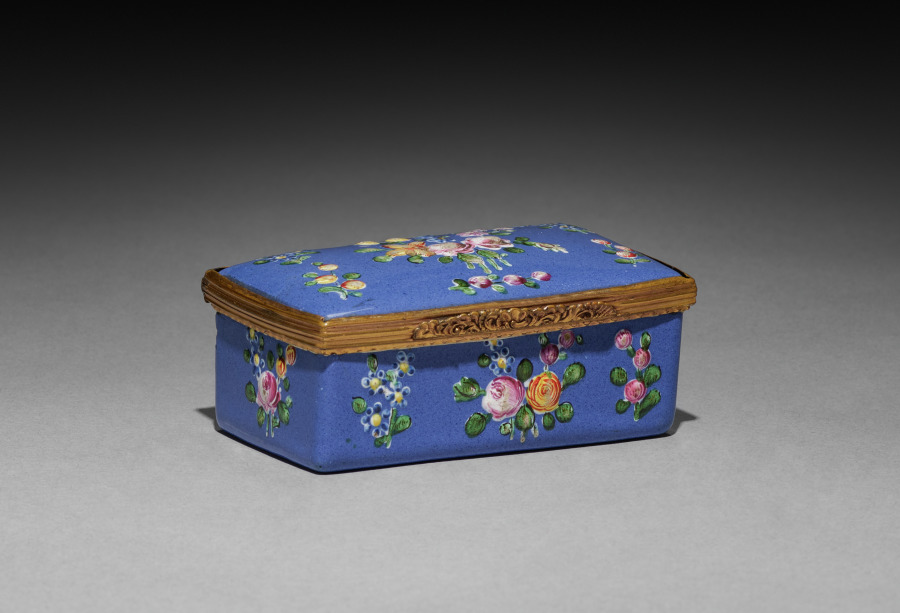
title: Snuff Box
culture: Germany ?, 19th century (?)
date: 1800s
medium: enamel on copper with metal mounts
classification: Miscellaneous